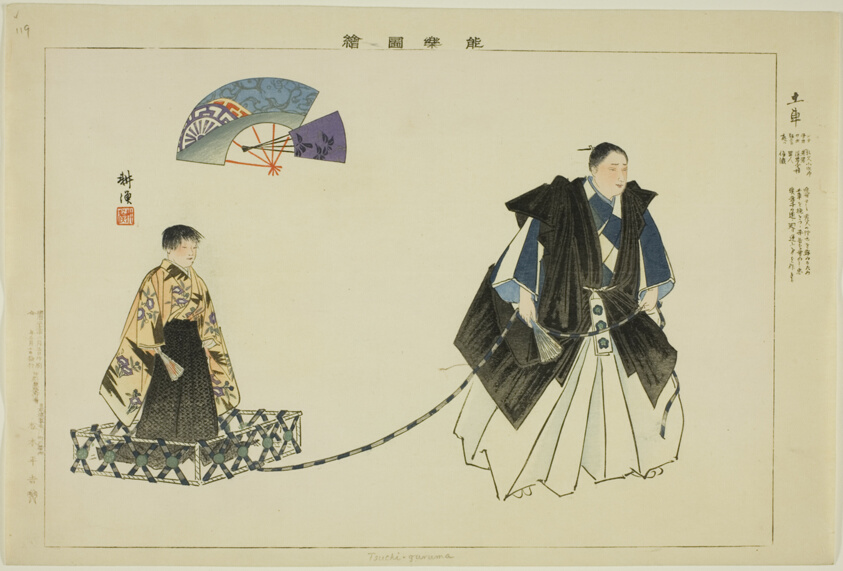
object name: Print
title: Tsuchi-guruma, from the series "Pictures of No Performances (Nogaku Zue)"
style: Japanese (culture or style)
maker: Tsukioka Kogyo; Japanese, 1869-1927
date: 1898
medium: Color woodblock print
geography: Japan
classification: woodblock print; print; asian art